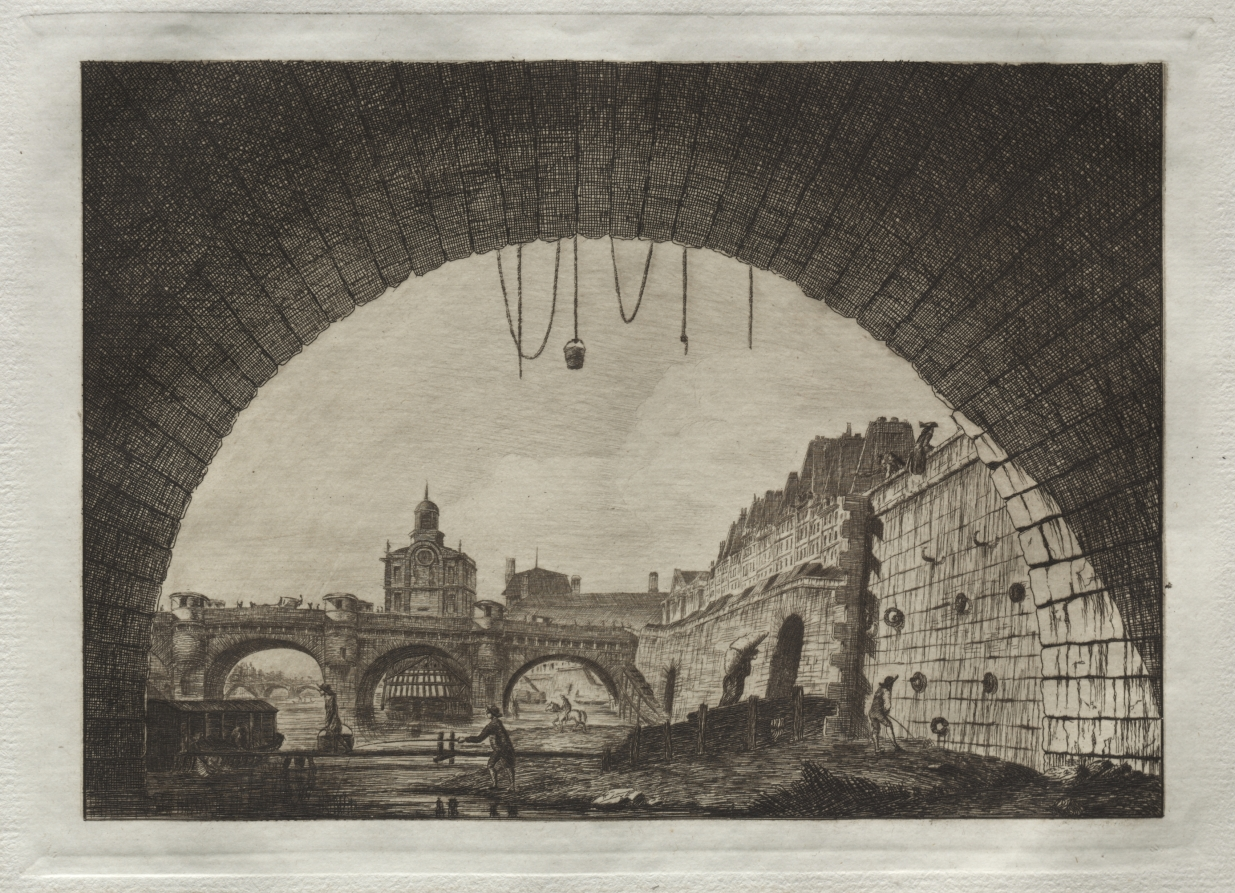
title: Le Pont Neuf et la Samaritaine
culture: France, 19th century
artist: Edmond Gosselin (French)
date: c. 1881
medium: etching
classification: Print